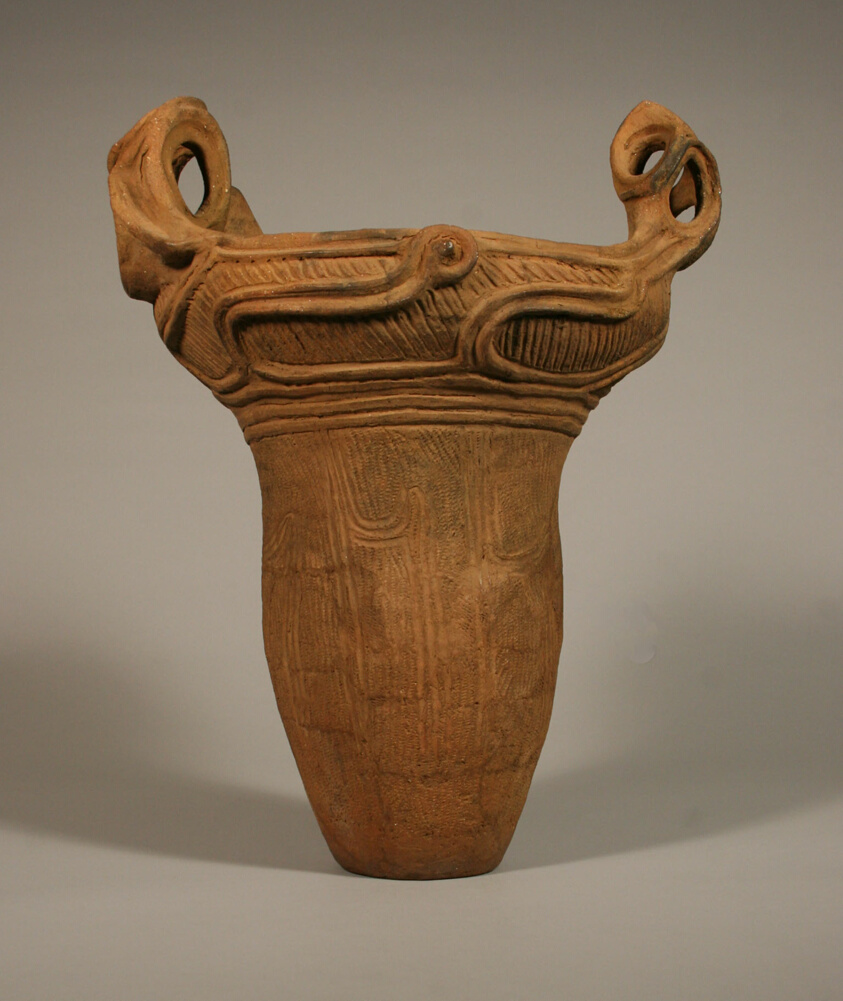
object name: Vessel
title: Jar with Handles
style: Japanese (culture or style)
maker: Japan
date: c. 2000 B.C.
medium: Earthenware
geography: Japan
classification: earthenware; asian art; ceramics; vessel